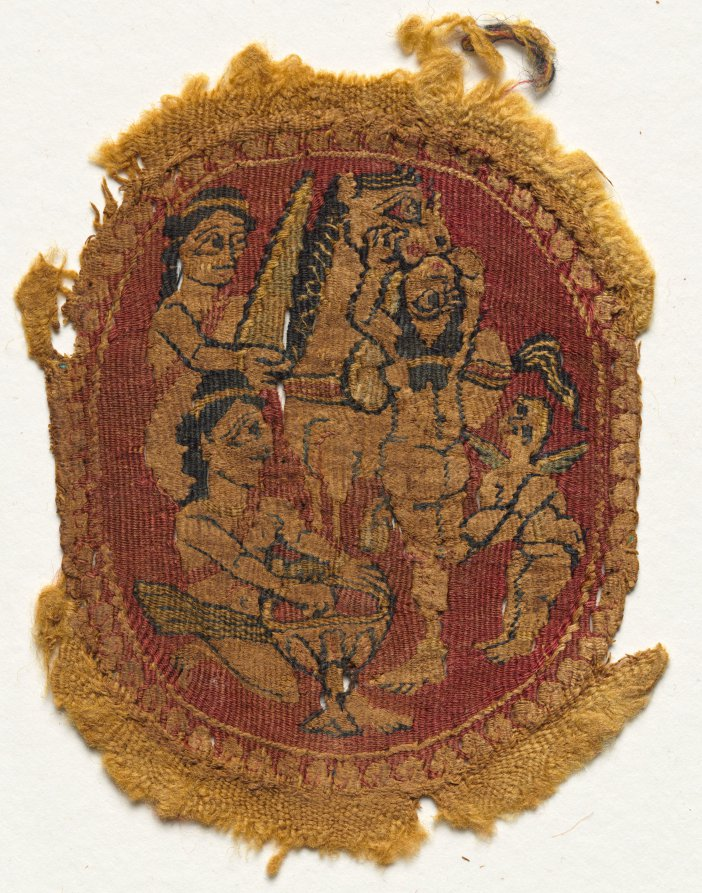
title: Five Round Segmenta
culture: Egypt, Umayyad period (661–750)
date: 650 – 750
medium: tapestry weave: wool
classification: Textile